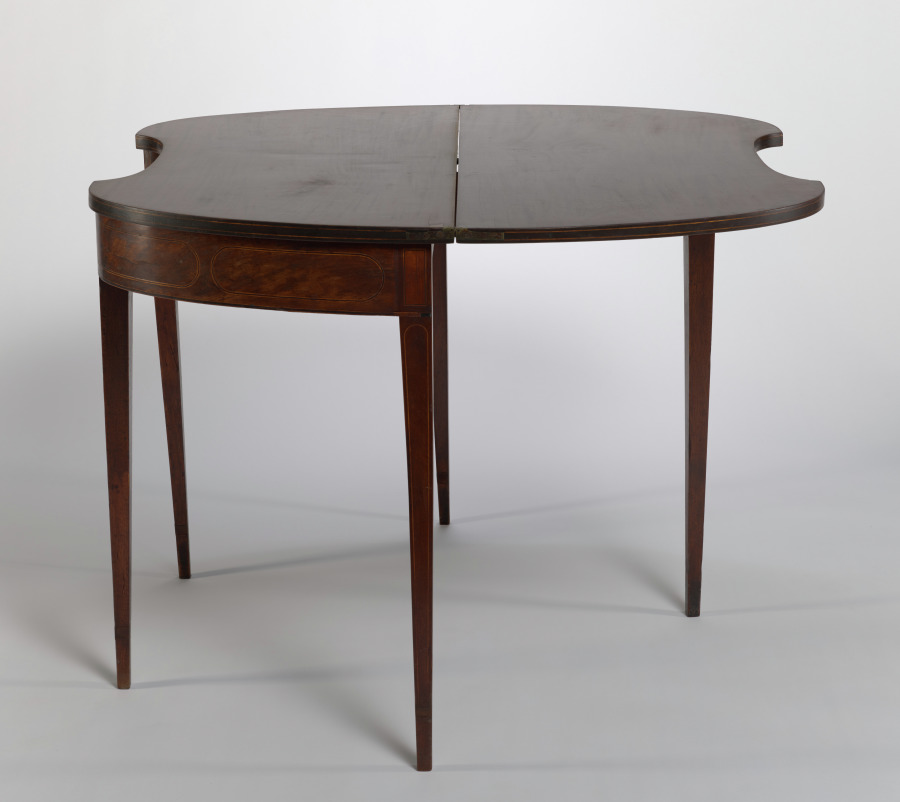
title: Game Table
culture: America, Maryland, Baltimore, early 19th Century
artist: style of George Hepplewhite (American, 1786)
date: c. 1800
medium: mahogany with inlays of various woods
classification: Furniture and woodwork